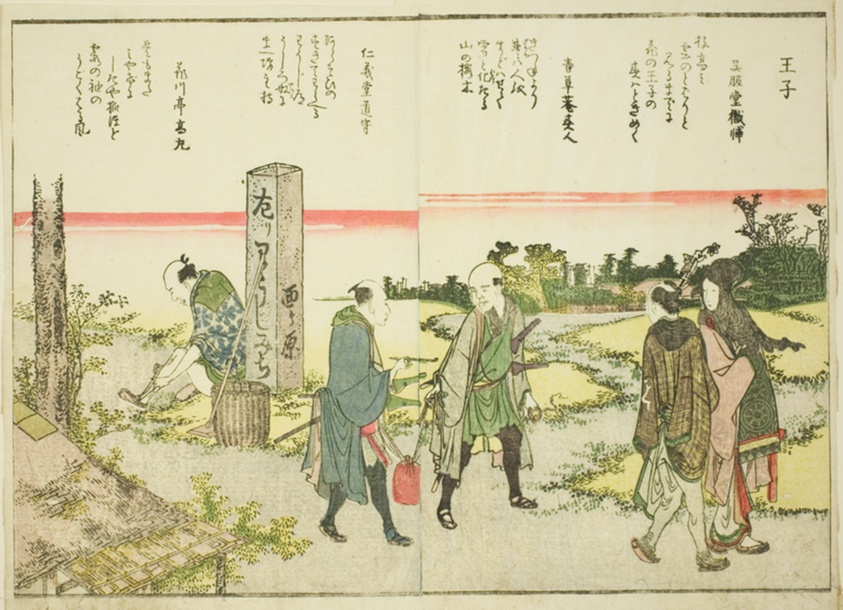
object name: Print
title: Oji, from vol. 1 of the illustrated book "Fine Views of the Eastern Capital at a Glance (Toto shokei ichiran)"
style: Japanese (culture or style)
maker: Katsushika Hokusai 葛飾 北斎; Japanese, 1760-1849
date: 1800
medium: Color woodblock print; double-page illustration from book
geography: Japan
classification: woodblock print; print; asian art